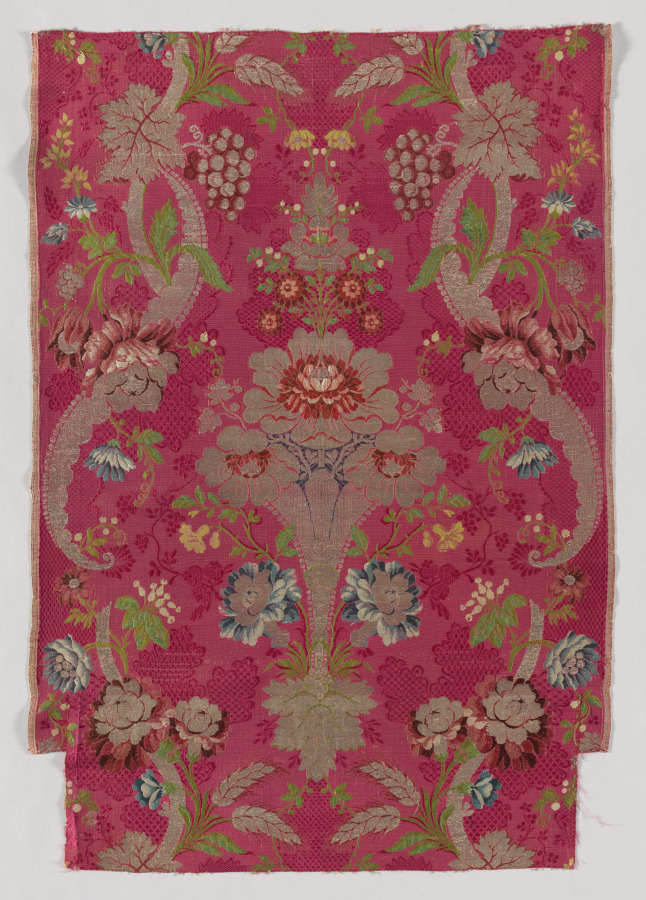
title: Silk Fragment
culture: Spain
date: 1700s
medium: plain compound cloth, brocaded; silk and metal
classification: Textile